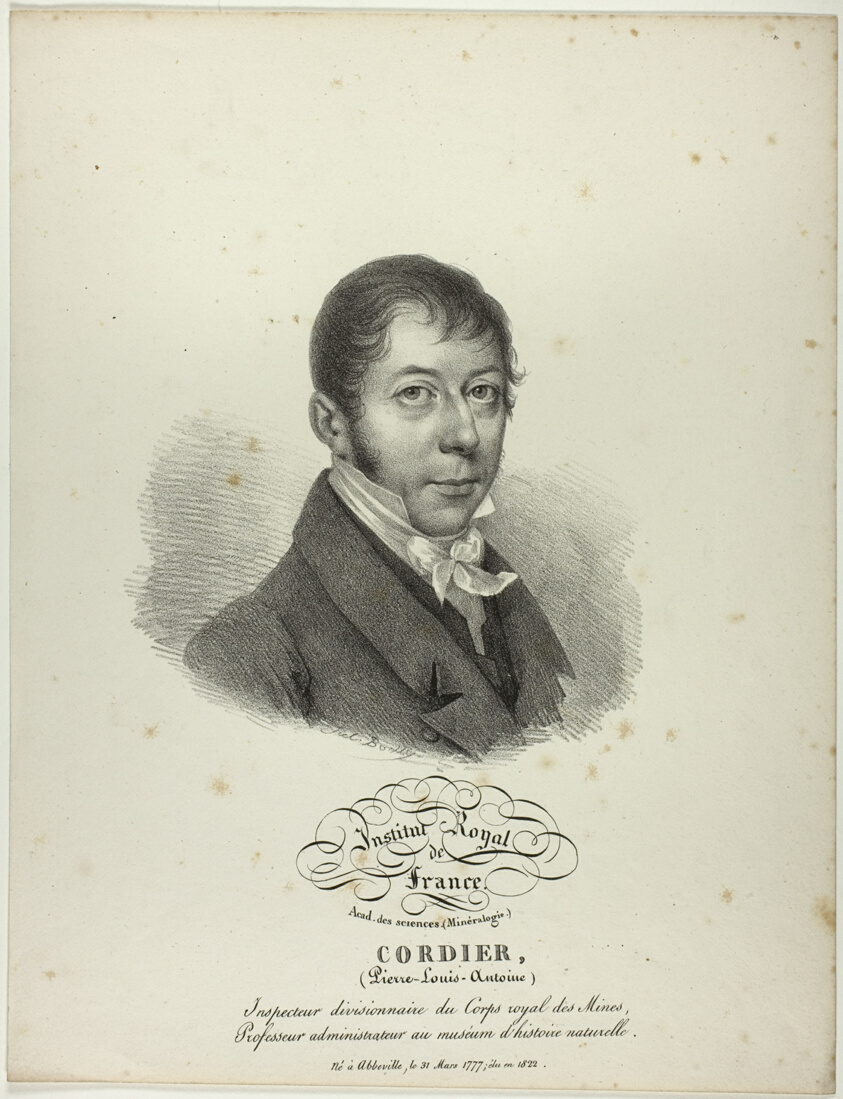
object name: Print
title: Portrait of Pierre-Louis-Antoine Cordier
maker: Jules Boilly (French, 1786-1874)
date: c. 1825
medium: Lithograph in black on ivory wove paper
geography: France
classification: lithograph; print; prints and drawing